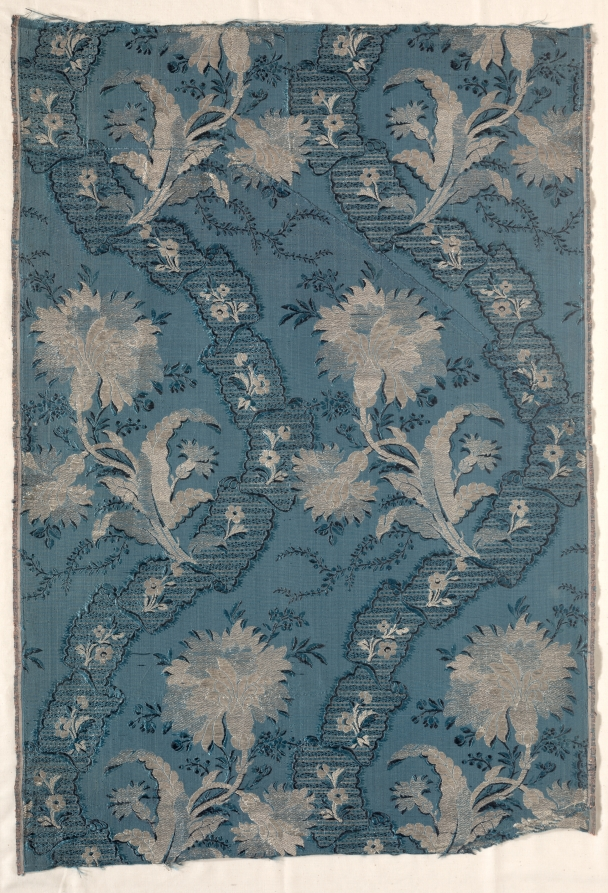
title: Two Joined Panels of Figured Silk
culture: France, 18th century, Period of Louis XV (1723-1774)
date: 1723–1774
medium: taffeta, brocaded; silk and silver thread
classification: Textile